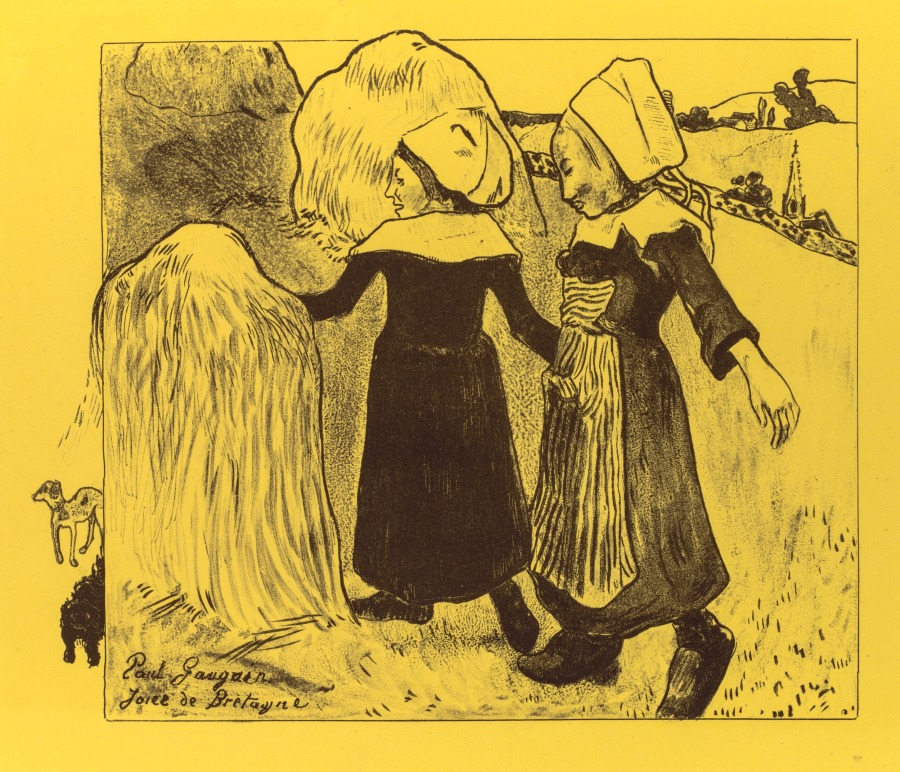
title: Volpini Suite: Joys of Brittany (Joies de Bretagne)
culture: France, 19th century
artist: Paul Gauguin (French, 1848–1903)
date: 1889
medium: zincograph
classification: Print